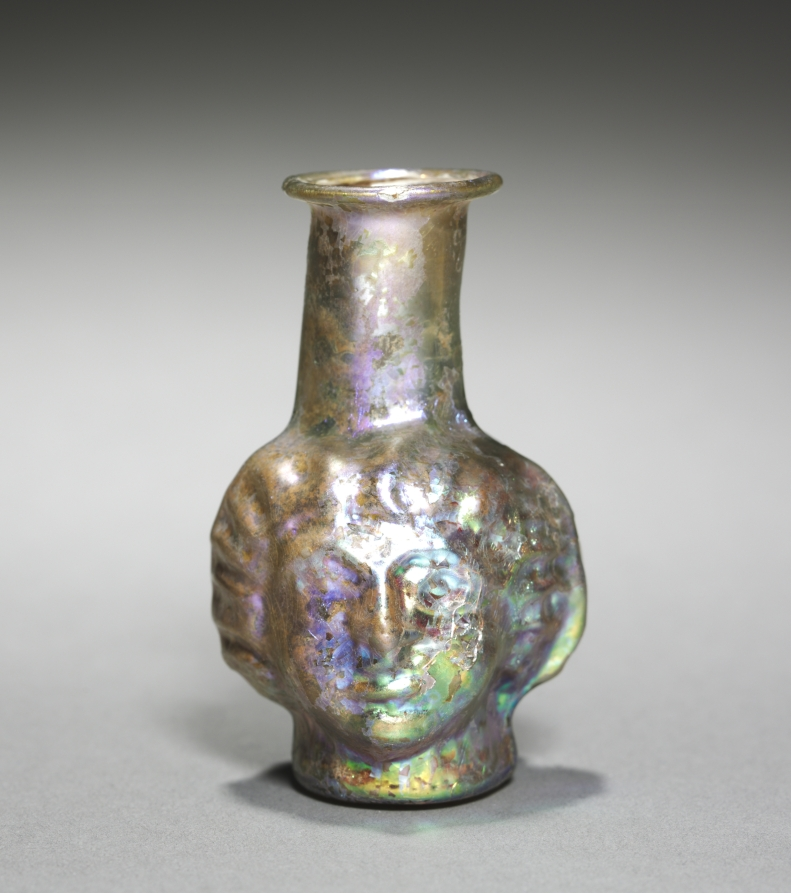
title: Janiform Head Flask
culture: Roman, probably Eastern Mediterranean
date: 100–400 CE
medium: glass, mold-blown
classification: Glass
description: Called Janiform after Janus, the two-faced Roman god associated with doorways and beginnings, two-faced head flasks like this were popular across the Roman Empire. The faces themselves, quite similar to one another, could both represent Janus, although he is typically bearded and here the gender is unclear. Some other two-faced head flasks clearly differentiate between the two sides, showing one serious, the other smiling.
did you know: The iridescence covering much of the surface obscures the original violet-like color.